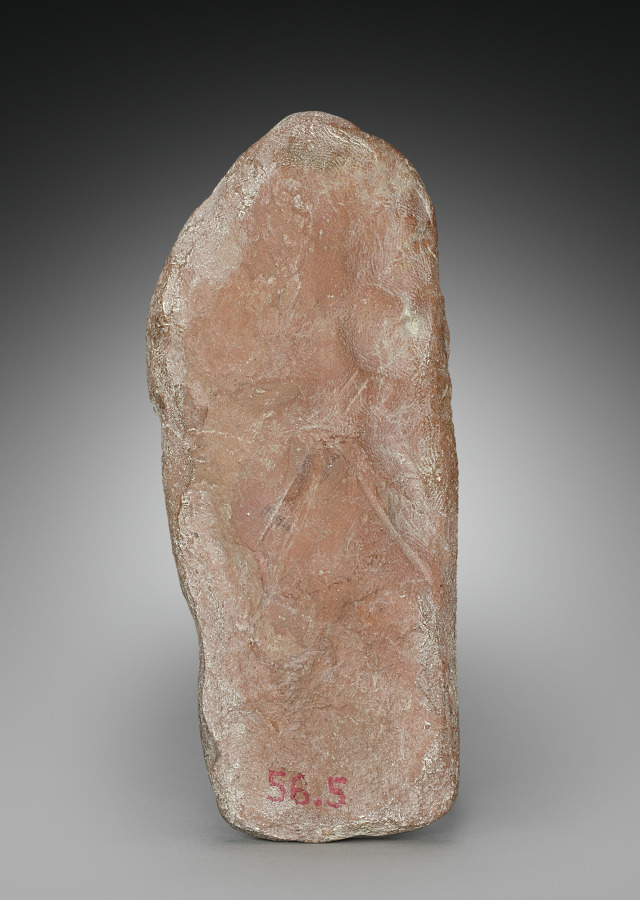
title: Mould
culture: India, Kashmir, 8th-9th Century (?)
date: 700s-800s(?)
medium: terracotta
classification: Ceramic